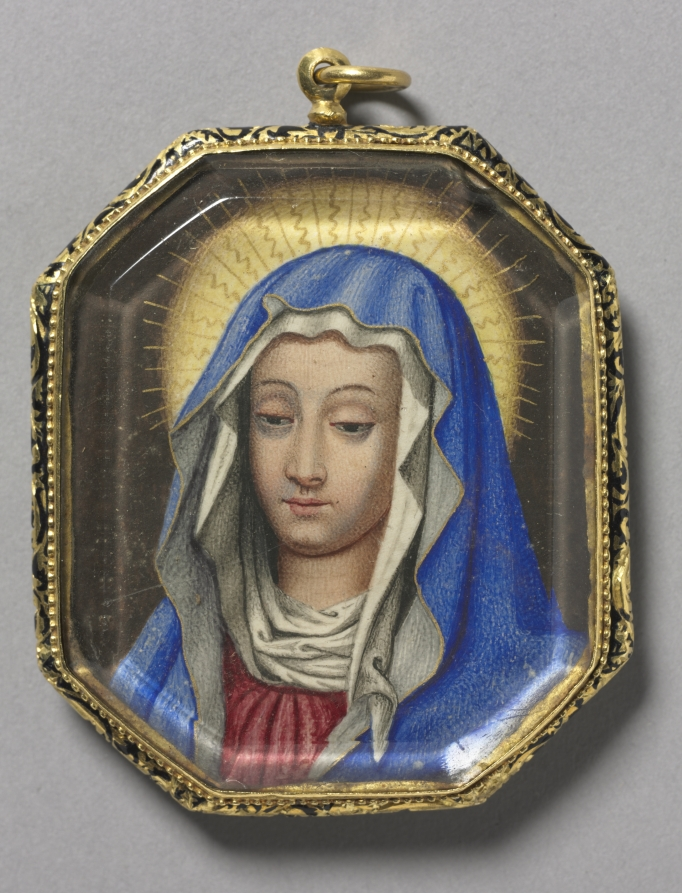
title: The Virgin (recto)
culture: Spain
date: c. 1660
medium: watercolor on vellum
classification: Portrait Miniature